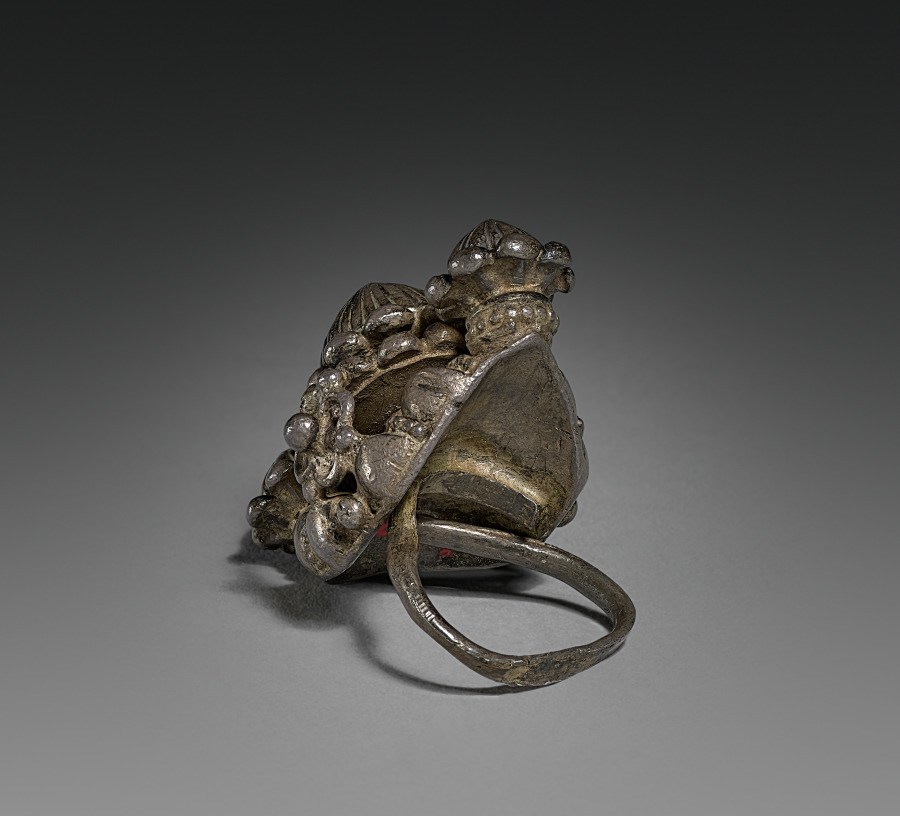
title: Toe Ring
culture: India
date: 1800s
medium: silver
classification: Jewelry